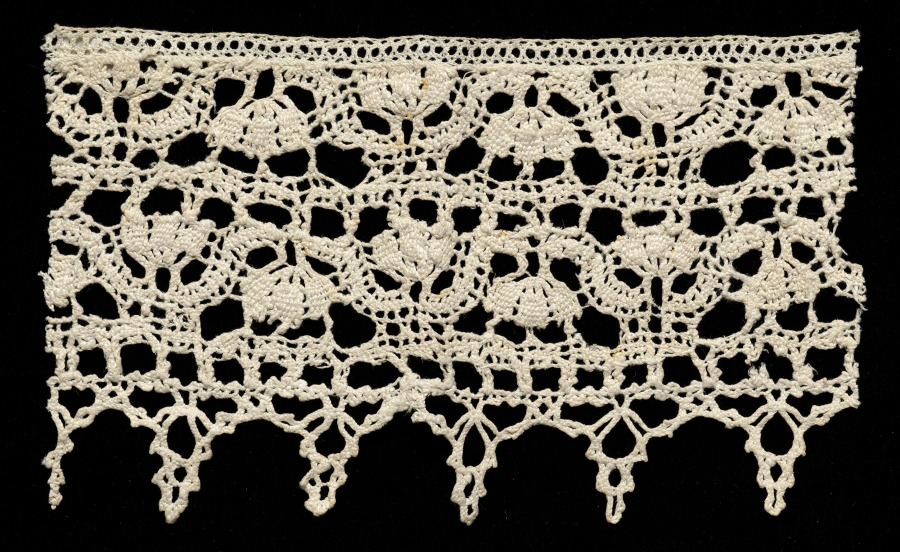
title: Lace Insertion with Edging of Points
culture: Italy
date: 1600s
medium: Bobbin lace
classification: Lace